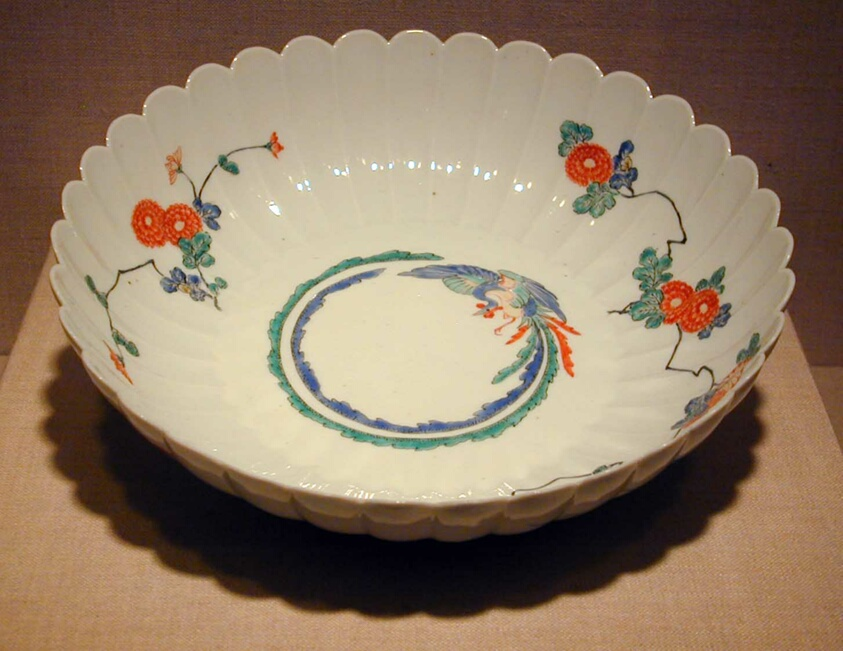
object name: Vessel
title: Arita Ware Kakiemon Floral-shaped Bowl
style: Japanese (culture or style)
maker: Japan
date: late 17th/early 18th century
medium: Porcelain with enamel decoration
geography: Japan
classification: bowl; porcelain; dish (vessel); asian art; ceramics; vessel